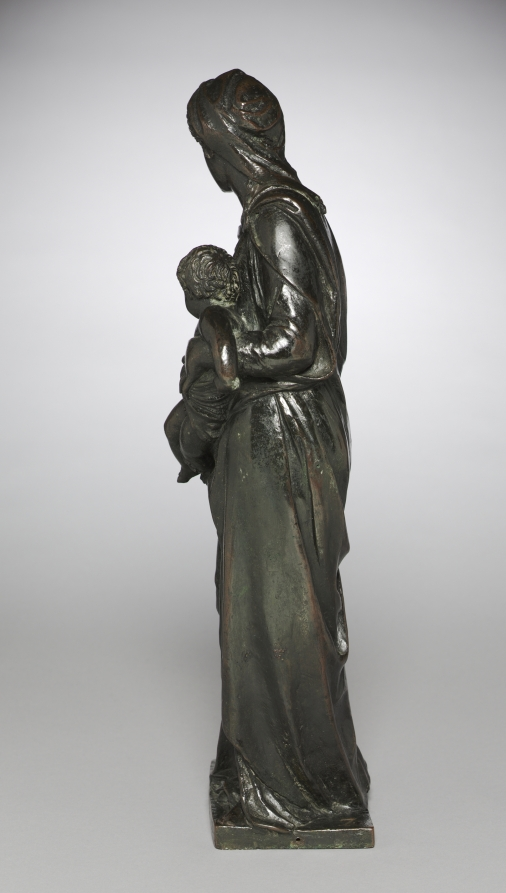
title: Virgin and Child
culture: Italy, 16th century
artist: Jacopo Sansovino (Italian, 1486–1570)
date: early 1530s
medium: bronze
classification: Sculpture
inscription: inscribed across the front of the base: IACOBVS SANSOV.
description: This statue is a scaled-down version of a marble figure the sculptor and architect Jacopo Sansovino carved for the funerary monument of a nobleman in Verona, Italy. Balancing the stable mass of the Virgin with the seemingly weightless, elongated child draped gracefully across her torso, the composition illustrates Sansovino’s skill. After training in Florence, he relocated to Rome before eventually settling in Venice in 1527. Sansovino contributed significantly to public and private projects across the region, from important civic buildings and tomb sculpture to intimately scaled bronzes, such as this example from his early Venetian period.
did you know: Sansovino's signature on the base—uncommon for bronzes of this period—marks this as a work of particular importance.